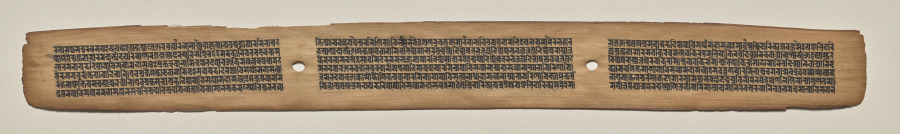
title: Text, folio 179 (recto), from a Manuscript of the Perfection of Wisdom in Eight Thousand Lines (Ashtasahasrika Prajnaparamita-sutra)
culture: Eastern India, Bihar, Vikramashila Monastery. Painting: Nepal, Kathmandu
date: Sunday, September 14, 1119 (year 239 of the Newar Samvat in the month of Ashvina)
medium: gum tempera and ink on palm leaves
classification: Painting